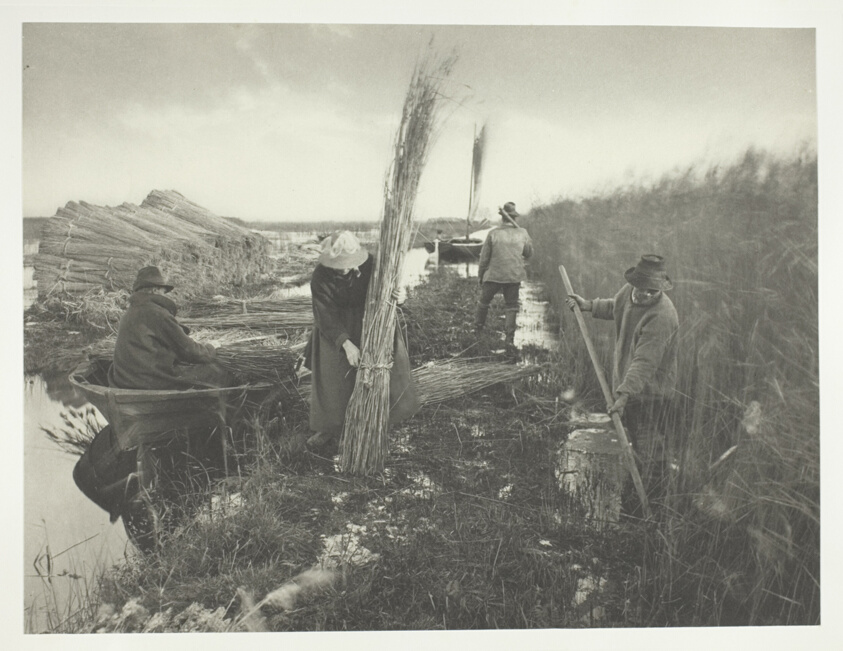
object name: Photograph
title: During the Reed Harvest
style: 19th century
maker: Peter Henry Emerson (English, born Cuba, 1856–1936)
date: 1886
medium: Platinum print, pl. XXVIII from the album "Life and Landscape on the Norfolk Broads" (1886)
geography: England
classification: platinum print; photographic process; photography; photograph